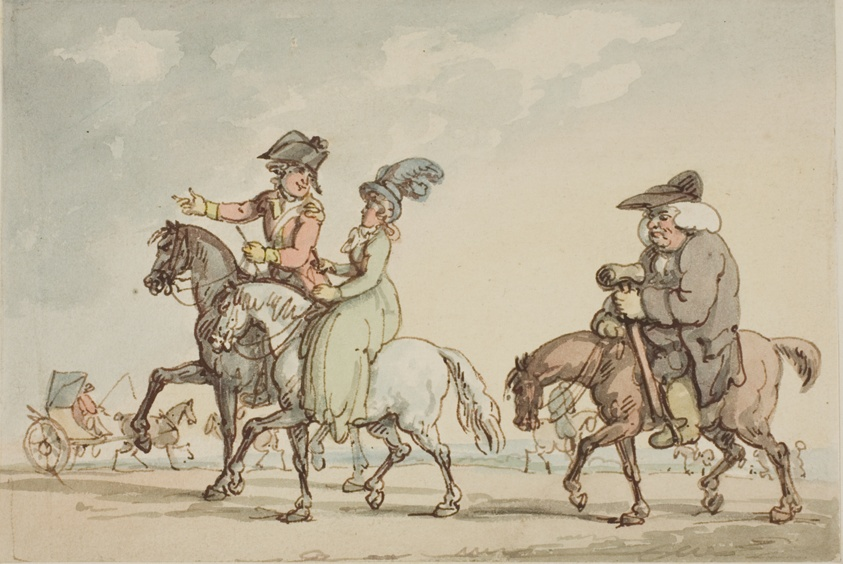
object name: Drawing and Watercolor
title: Study for Comforts of Bath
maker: Thomas Rowlandson (English, 1756-1827)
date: c. 1798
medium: Pen and brown ink with brush and watercolor, on cream wove paper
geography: England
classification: watercolor; drawings (visual works); prints and drawing